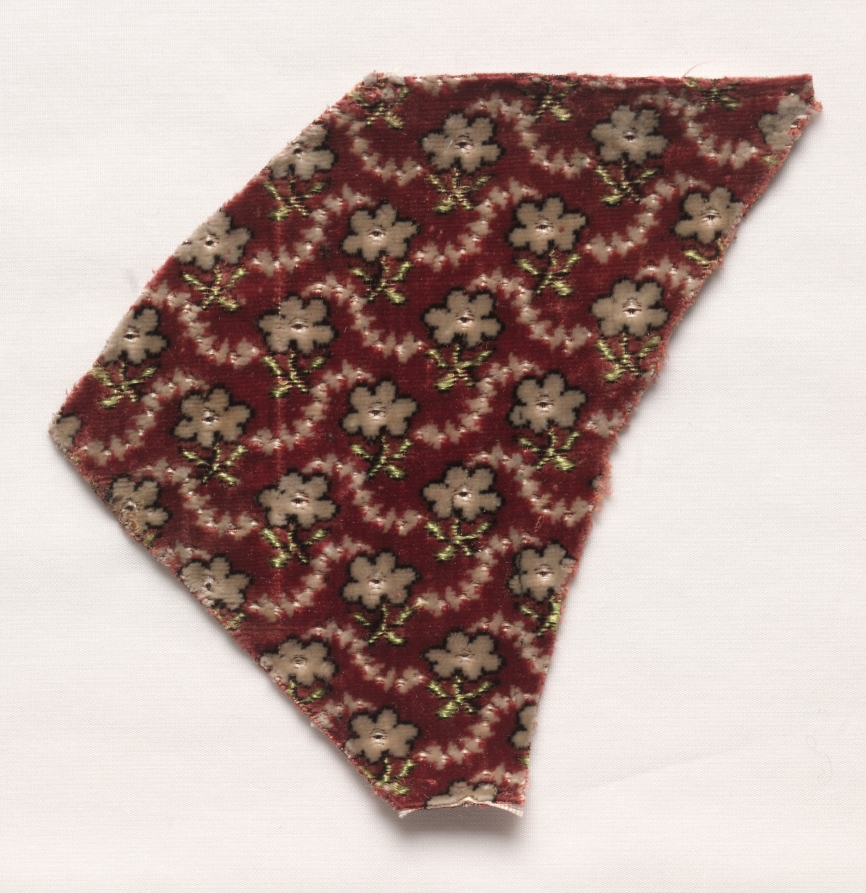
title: Textile Fragment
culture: France, late 18th century, Period of Louis XVI (1774-1793)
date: 1774–1793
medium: velvet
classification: Velvet